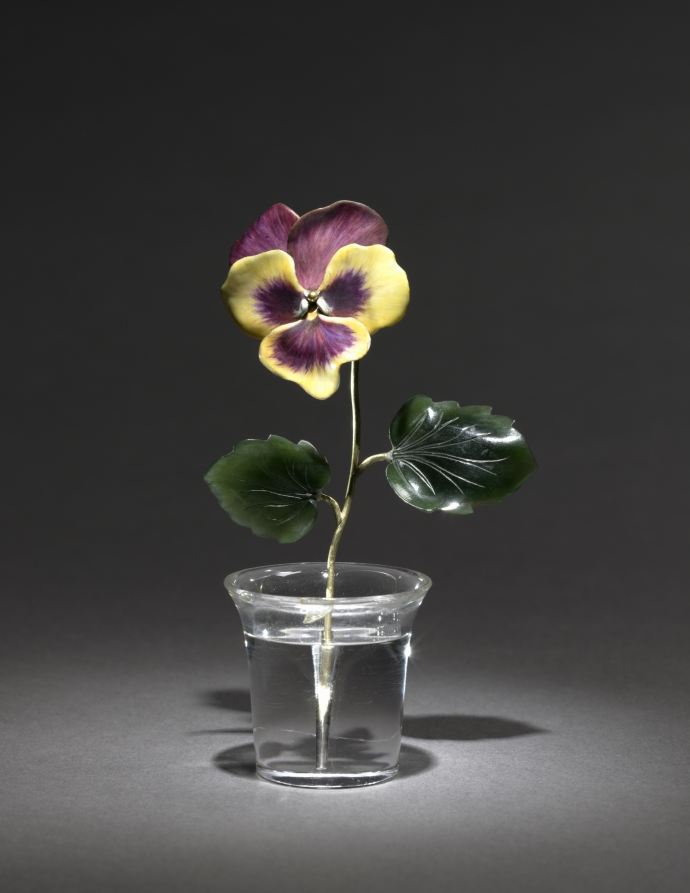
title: Flower Study of a Pansy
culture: Russia, St. Petersburg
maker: House of Fabergé (Russian, 1842–1918)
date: c. 1885–1915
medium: gold, jade, enamel, rock crystal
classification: Miscellaneous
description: This flower study depicts a pansy in bloom. Fabergé’s inspiration for his flower studies is said to have come from the floral brooches of precious stones that were made in the 1700s for Catherine the Great as well as from the Japanese art of flower arranging, known as ikebana. Small and delicate, Fabergé’s flower studies were given as intimate gifts to friends by the tsarina and others in the court. She also liked to take them around to wherever the imperial family was residing as a reminder of spring during the harsh Russian winters.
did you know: The stems of Fabergé’s flower studies are set into little basins carved from rock crystal to resemble pots of water.